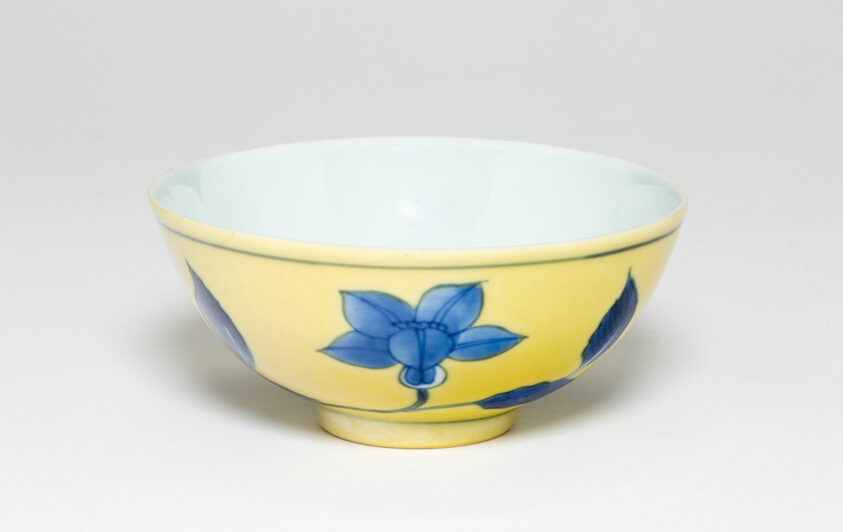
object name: Vessel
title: Bowl with Floral Scrolls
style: Chinese (culture or style)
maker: China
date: Qing dynasty (1644–1911), Kangxi period (1662–1722)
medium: Porcelain painted in underglaze blue and overglaze yellow enamel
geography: China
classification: bowl; dish (vessel); porcelain; asian art; ceramics; vessel